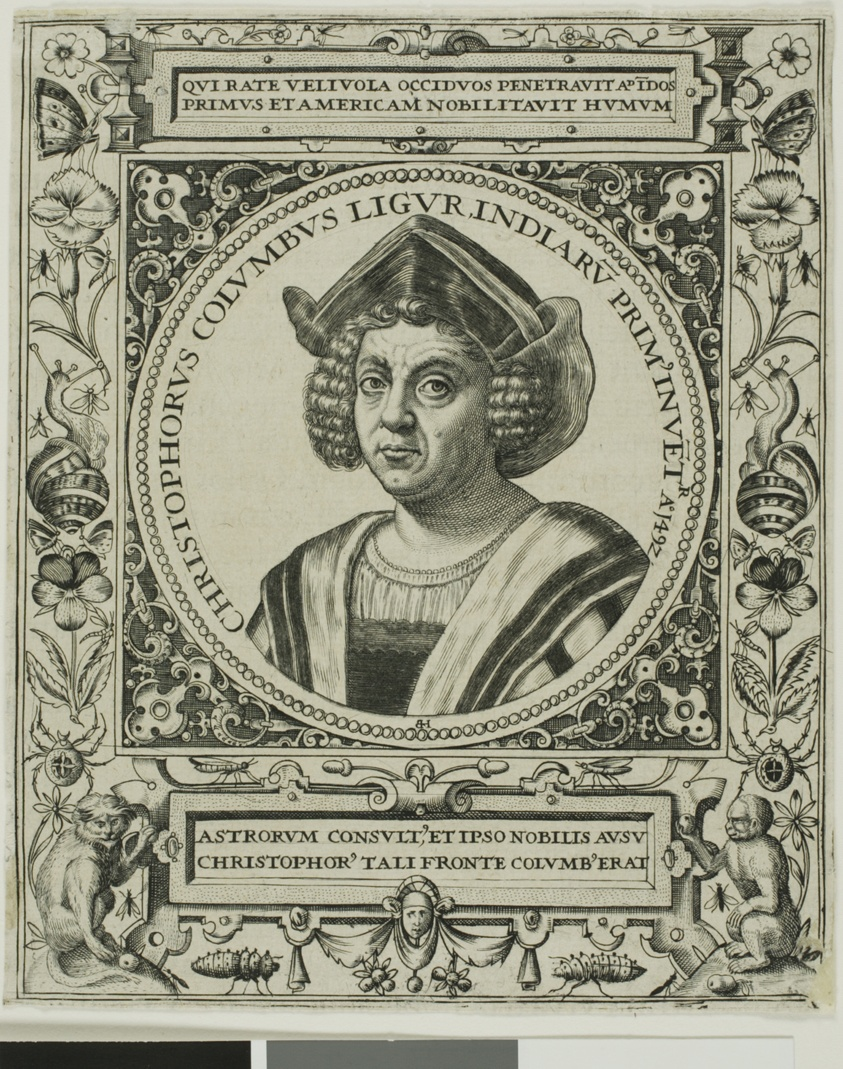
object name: Print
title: Christopher Columbus, frontispiece from volume 5 of Theodor de Bry's America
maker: Attributed to Johann Theodor de Bry (German, 1561-1623); after Sebastiano del Piombo (Italian, c. 1485-1547)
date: 1595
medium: Engraving in black on ivory laid paper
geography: Germany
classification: engraving; print; prints and drawing